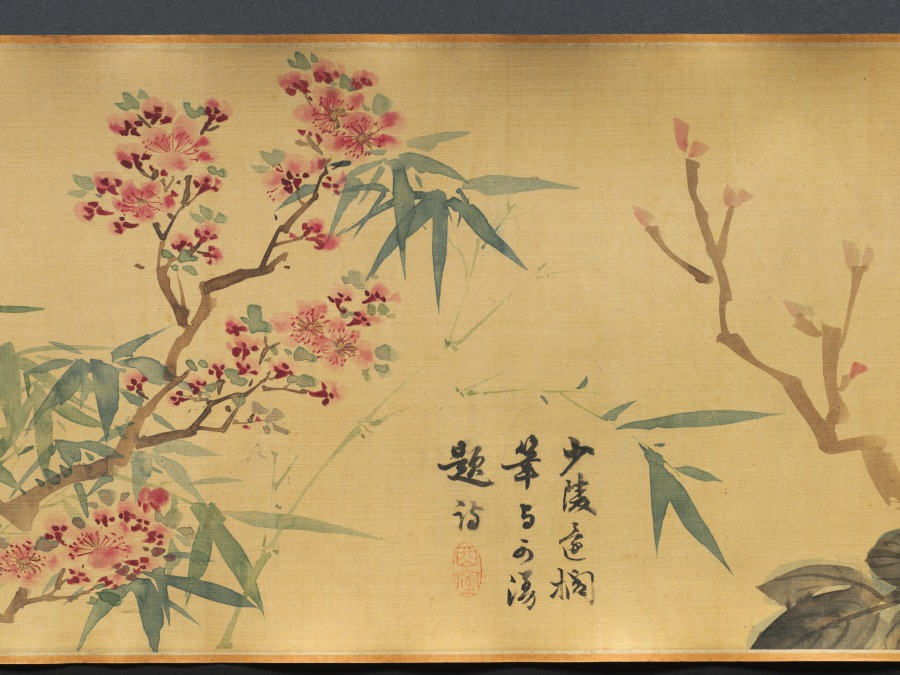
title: Flowers of Four Seasons, with Poems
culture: China, Ming dynasty (1368–1644)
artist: Wang Guxiang (Chinese, 1501–1568)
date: 1531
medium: handscroll; ink and light color on silk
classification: Painting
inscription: Artist's inscription, signature, and 15 seals. Ink Orchids. Sewn as pendants for the man of worth, swaying quiety, fragrance in the valley. [seal] Hsiao-chu ts'un Peony. Wiping his face, the young gentleman Ho [Ho Yen of Wei, Three Kingdoms] appears to have been powdered. His previous life was the perfume-stealing Han Shou [of Chin, 265–419 CE], the fragrance still lingers. [seal] Ts'un-wu chai. Flowering Crab Apple, New Bamboo. Shao-lin [Du Fu, 712–770] had to put down his brush. [Flowering Crab Apple]. Yü-k'o [Wen T'ung, d. 1079) in vain wrote poems about [Bamboo]. [seal] Yu-shih. Lotus Flowers. When she turns her head, half-hidden by a fan, and casts a glance, all the beautiful women become colorless. [seal] K'ang yüeh huai. Loquat. Ripeness in summer. [seal] Lu-chih. Pomegranate Flower. Whenever I remember you I will send my thoughts, but where have you gone--the [skirt] of pomegranate red? [seal] Wu-ho Sheng. Day Lily. Plant the day lily to forget sorrow. [seal] Yu-shih. Chrysanthemum. The untrammelled joy at the eastern fence. [seal] Lu-chih. Begonia. Comparing it to the beauties of Spring, and spreading them out as trimming for the stone steps. [seal] Yu-shih. Hibiscus. In recent years I have always enjoyed looking at flowers; instead of dark red I preferred pink ones. [seal] Jen-sheng i-lou. Narcissus, Camellia. The jade girdle left behind at Lo River. [Narcissus]. The precious pearls glitter before Spring. [Camellia]. [seal] Lu-chih. Heavenly Bamboo (Nandina domestica). A single branch in the wintry season. [seal] K'ang yüeh huai. Plum. Fragrant snow in the Lo-fou Mountains. [seal] Ts'un-wu chai. In the eleventh lunar month of the hsin-mao year of the Jiaqing era [1531], [I] imitated the boneless style of Yüan masters in sketching from life. Guxiang [seals] Yu-shih; Lu-chih. Translated by Wai-kam Ho/Lingyun Shih Liu (1980)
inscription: 2 colophons and 23 additional seals: 1 colophon dated 1632, and 2 seals of Li Jih-hua [Li Rihua] 李日華 (1565–1635); 1 colophon and 2 seals of Xiang Shengmo 項聖謨 (1597–1658); 3 seals of Liang Qingbiao 梁清標 (1620–1691); 6 seals of the Jiaqing 嘉慶 emperor (r. 1796–1820); 9 seals of Ch'eng Ch'i [Cheng Qi] 程琦 (1911–1988)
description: In this painting, flowers are loosely arranged by the seasons: narcissus and peony represent early spring; yellow loquat and lotus, summer; chrysanthemum, autumn; and the plum and evergreen bamboo, winter. The artist added to each flower a poetic line of calligraphy associating each plant with a historic or legendary figure. For example, the chrysanthemum, along with the line “The untrammeled joy at the eastern fence,” refers to the poet Tao Yuanming (died AD 427) who enjoyed chrysanthemums at the eastern fence in his garden. The scroll illustrates Wang Guxiang’s mastery of free brushwork, combining light monochrome ink with transparent colors. In his inscription, Wang says he used the “boneless” style without outlines as developed during the Yuan dynasty (1279–1368). Wang was a native of Changzhou, a city in southeast China known for its rich flora and fauna, and flower-and-bird painting tradition.